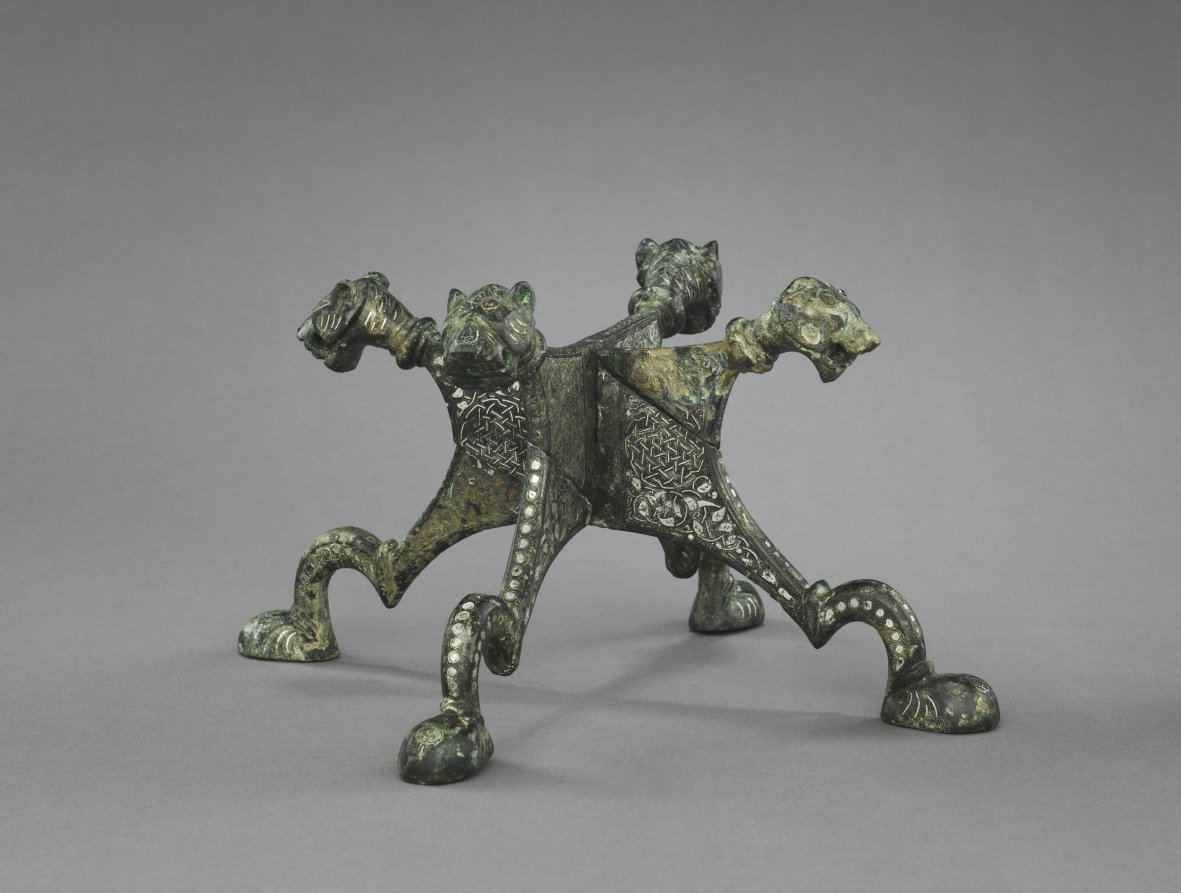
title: Lion-headed Stand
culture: Northern Iraq or Syria, Zengid or Ayyubid period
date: 1150–1220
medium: cast brass inlaid with silver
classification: Metalwork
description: The four sections of this stand each terminate in a lion's head and the supporting legs end with a paw. The angular modeling of the lion's head contrasts with the delicate silver inlaid decoration.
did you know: The bronze stand is embellished with silver inlay in both floral and geometric design.